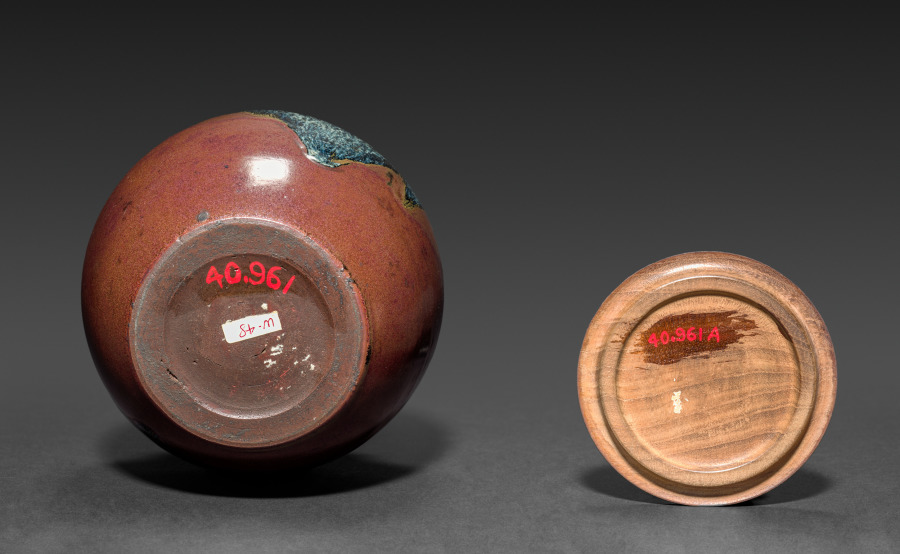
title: Jar with Wooden Cover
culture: Japan, Edo period (1615–1868)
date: 1700s-1800s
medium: pottery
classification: Ceramic